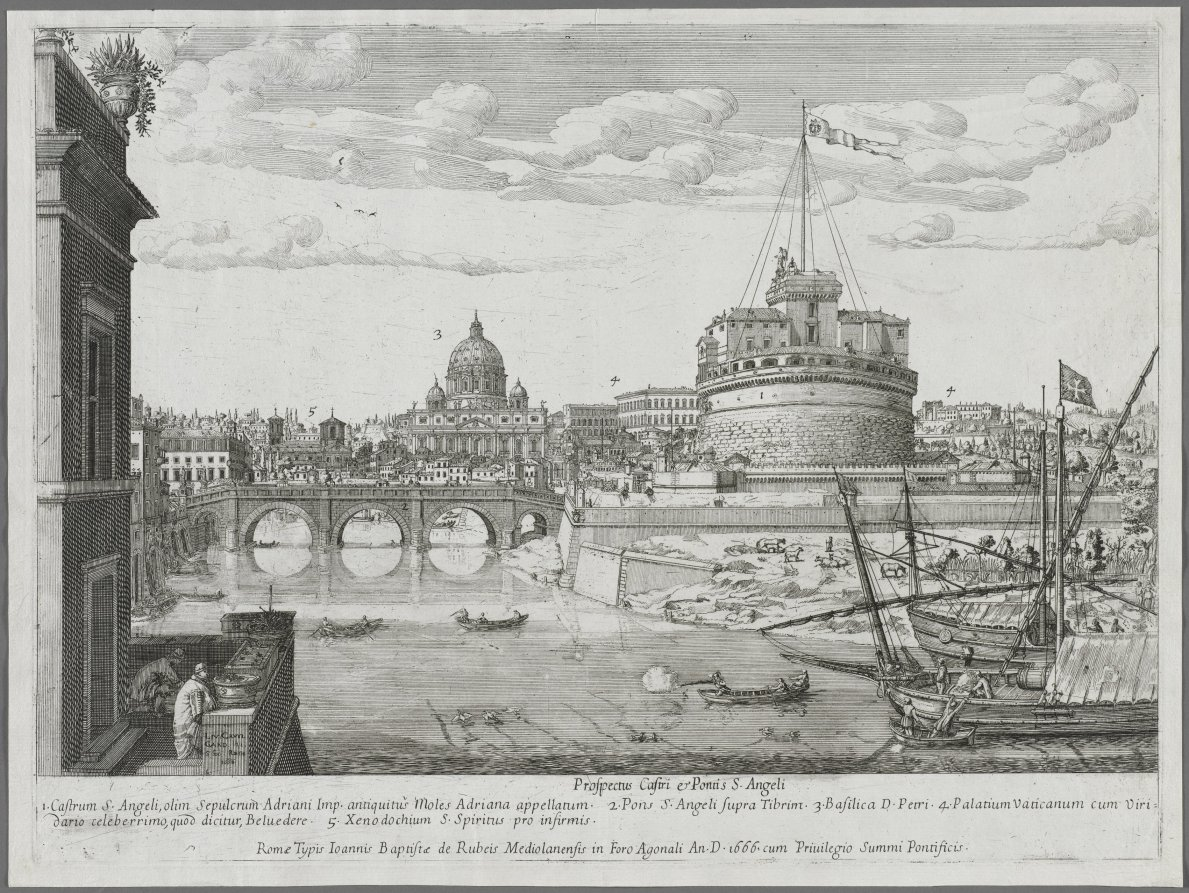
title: St. Angelo from "Prospectus Locurum Urbis Romae Insign[ium]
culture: Flanders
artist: Lievin Cruyl (Flemish, c. 1640-c. 1720)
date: 1666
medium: etching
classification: Print